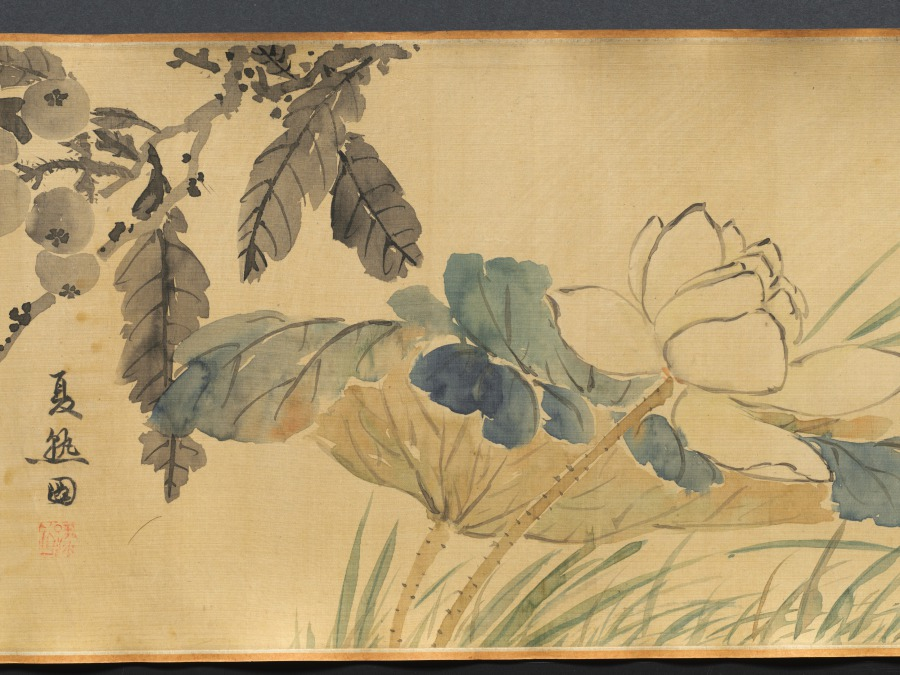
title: Flowers of Four Seasons, with Poems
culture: China, Ming dynasty (1368–1644)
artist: Wang Guxiang (Chinese, 1501–1568)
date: 1531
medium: handscroll; ink and light color on silk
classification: Painting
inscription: Artist's inscription, signature, and 15 seals. Ink Orchids. Sewn as pendants for the man of worth, swaying quiety, fragrance in the valley. [seal] Hsiao-chu ts'un Peony. Wiping his face, the young gentleman Ho [Ho Yen of Wei, Three Kingdoms] appears to have been powdered. His previous life was the perfume-stealing Han Shou [of Chin, 265–419 CE], the fragrance still lingers. [seal] Ts'un-wu chai. Flowering Crab Apple, New Bamboo. Shao-lin [Du Fu, 712–770] had to put down his brush. [Flowering Crab Apple]. Yü-k'o [Wen T'ung, d. 1079) in vain wrote poems about [Bamboo]. [seal] Yu-shih. Lotus Flowers. When she turns her head, half-hidden by a fan, and casts a glance, all the beautiful women become colorless. [seal] K'ang yüeh huai. Loquat. Ripeness in summer. [seal] Lu-chih. Pomegranate Flower. Whenever I remember you I will send my thoughts, but where have you gone--the [skirt] of pomegranate red? [seal] Wu-ho Sheng. Day Lily. Plant the day lily to forget sorrow. [seal] Yu-shih. Chrysanthemum. The untrammelled joy at the eastern fence. [seal] Lu-chih. Begonia. Comparing it to the beauties of Spring, and spreading them out as trimming for the stone steps. [seal] Yu-shih. Hibiscus. In recent years I have always enjoyed looking at flowers; instead of dark red I preferred pink ones. [seal] Jen-sheng i-lou. Narcissus, Camellia. The jade girdle left behind at Lo River. [Narcissus]. The precious pearls glitter before Spring. [Camellia]. [seal] Lu-chih. Heavenly Bamboo (Nandina domestica). A single branch in the wintry season. [seal] K'ang yüeh huai. Plum. Fragrant snow in the Lo-fou Mountains. [seal] Ts'un-wu chai. In the eleventh lunar month of the hsin-mao year of the Jiaqing era [1531], [I] imitated the boneless style of Yüan masters in sketching from life. Guxiang [seals] Yu-shih; Lu-chih. Translated by Wai-kam Ho/Lingyun Shih Liu (1980)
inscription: 2 colophons and 23 additional seals: 1 colophon dated 1632, and 2 seals of Li Jih-hua [Li Rihua] 李日華 (1565–1635); 1 colophon and 2 seals of Xiang Shengmo 項聖謨 (1597–1658); 3 seals of Liang Qingbiao 梁清標 (1620–1691); 6 seals of the Jiaqing 嘉慶 emperor (r. 1796–1820); 9 seals of Ch'eng Ch'i [Cheng Qi] 程琦 (1911–1988)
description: In this painting, flowers are loosely arranged by the seasons: narcissus and peony represent early spring; yellow loquat and lotus, summer; chrysanthemum, autumn; and the plum and evergreen bamboo, winter. The artist added to each flower a poetic line of calligraphy associating each plant with a historic or legendary figure. For example, the chrysanthemum, along with the line “The untrammeled joy at the eastern fence,” refers to the poet Tao Yuanming (died AD 427) who enjoyed chrysanthemums at the eastern fence in his garden. The scroll illustrates Wang Guxiang’s mastery of free brushwork, combining light monochrome ink with transparent colors. In his inscription, Wang says he used the “boneless” style without outlines as developed during the Yuan dynasty (1279–1368). Wang was a native of Changzhou, a city in southeast China known for its rich flora and fauna, and flower-and-bird painting tradition.